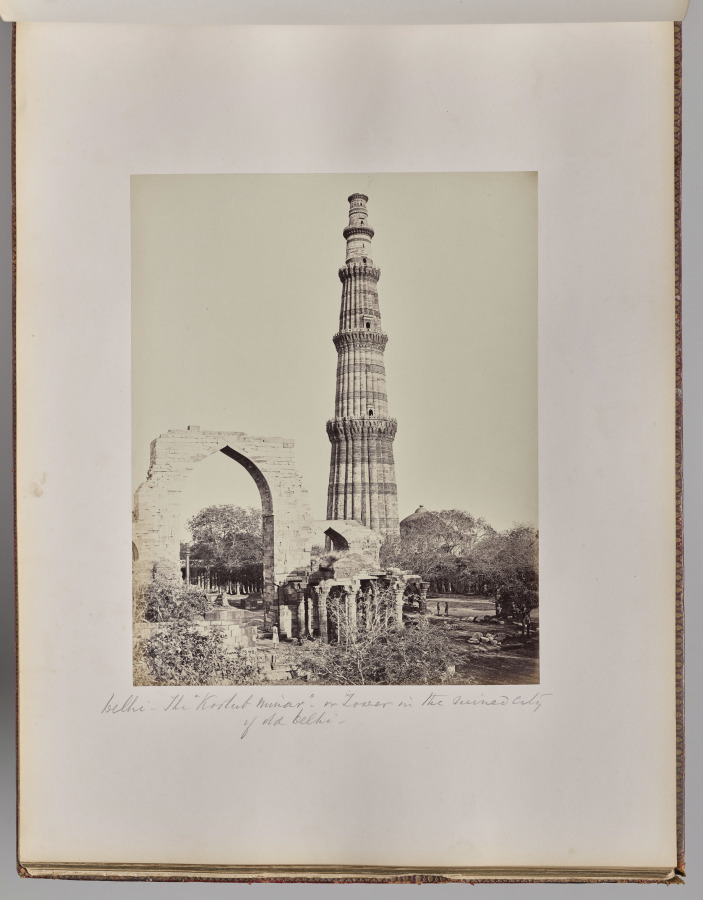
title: Delhi. The Kootub Minar or Tower in the Ruined City of Old Delhi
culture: England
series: Photographs of Northern India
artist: Samuel Bourne (British, 1834–1912)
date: 1863–70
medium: albumen print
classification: Photograph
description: The 50 images in this album, all taken in the 1860s, move from the hill towns of the Himalayas down to cities including Lahore (now in Pakistan), Delhi, Lucknow, Agra, Benares (now Varansi), and Calcutta (now Kolkata). Architectural studies of major monuments offer valuable historical records of what sites such as the Taj Mahal and the imperial mosque of the Mughal emperors in Delhi looked like before twentieth-century restorations.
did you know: Samuel Bourne, the author of most the images in this album, was a banker in England before he moved to India to become a professional photographer.